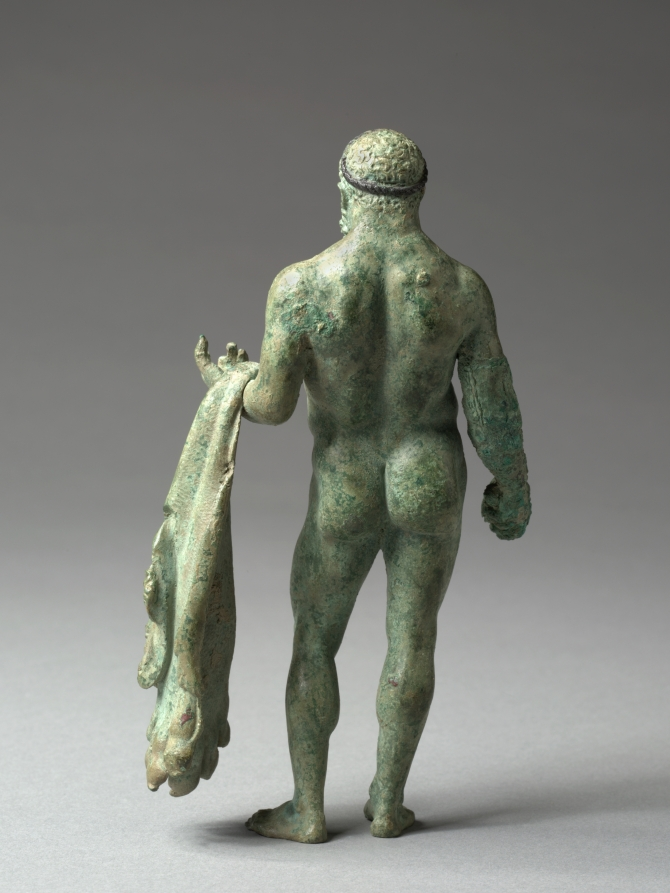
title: Hercules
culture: Italy, Rome, Early Imperial period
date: c. 30 BCE–20 CE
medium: bronze with silver and copper inlays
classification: Sculpture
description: This bronze statuette is a nude figure of the hero Hercules. He stands in a contrapposto pose, with the majority of his weight on one leg. Over his left arm, Hercules holds the skin of the Nemean Lion, having slayed the beast as part of his Twelve Labors and now carrying the pelt as a trophy. Although now mostly lost, Hercules once held his signature wooden club in his right hand. Roman artists often portrayed Hercules as middle-aged, as though greater maturity would increase his power and virility.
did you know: Hercules is the Roman name for the classical hero known in Greek as Herakles.